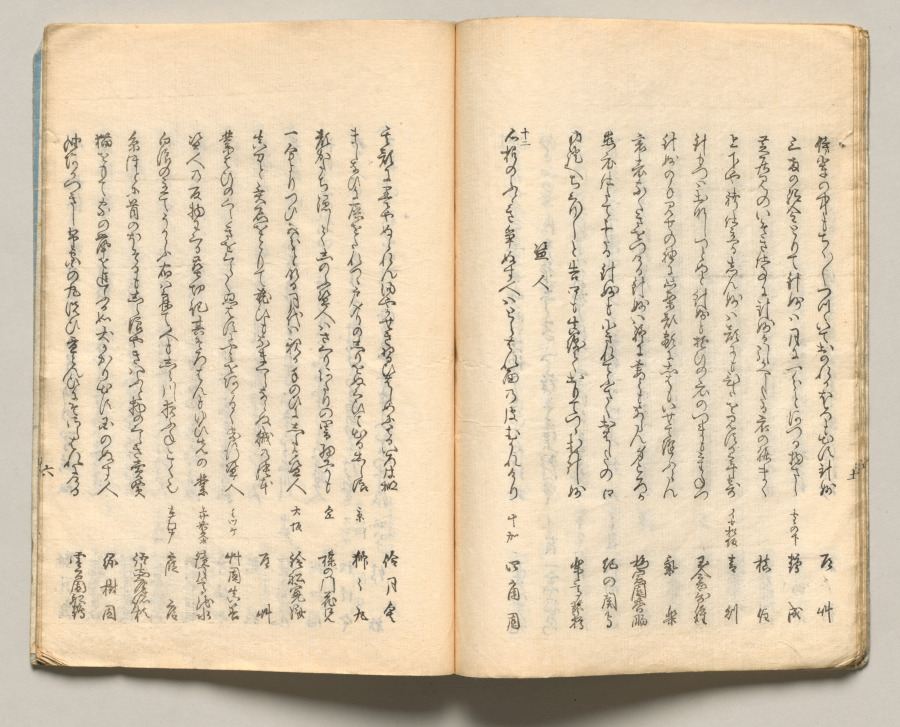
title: Spread Thirteen from Volume Six of People of Japan in Light Verse (Kyōka)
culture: Japan, Edo period (1615–1868)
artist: Utagawa Hiroshige (Japanese, 1797–1858)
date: 1857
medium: Woodblock-printed book; ink and color on paper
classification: Bound Volume